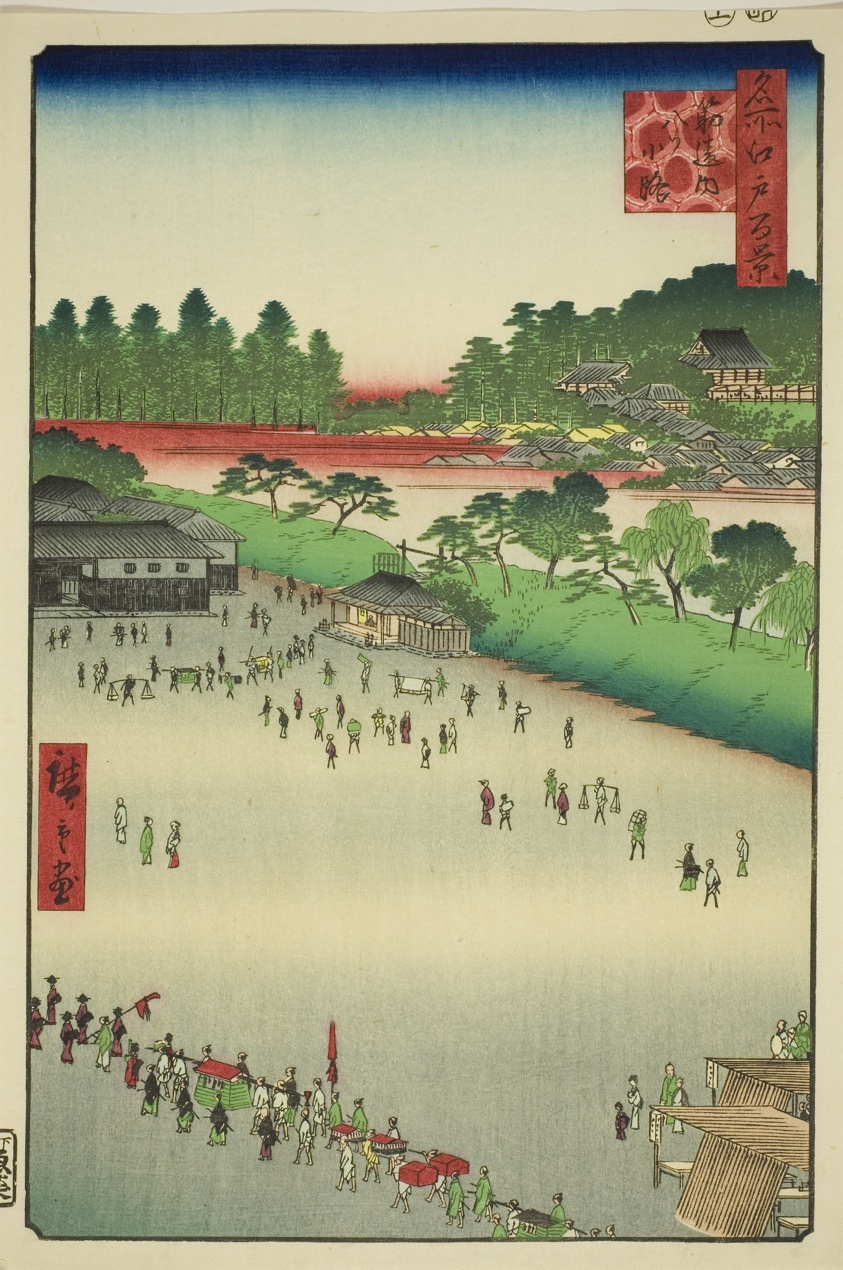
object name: Print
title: Yatsukoji, Inside Sujikai Gate (Sujikai-uchi Yatsukoji), from the series “One Hundred Famous Views of Edo (Meisho Edo hyakkei)”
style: Japanese (culture or style)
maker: Utagawa Hiroshige 歌川 広重; Japanese, 1797-1858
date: 1857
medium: Color woodblock print; oban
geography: Japan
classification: woodblock print; print; asian art